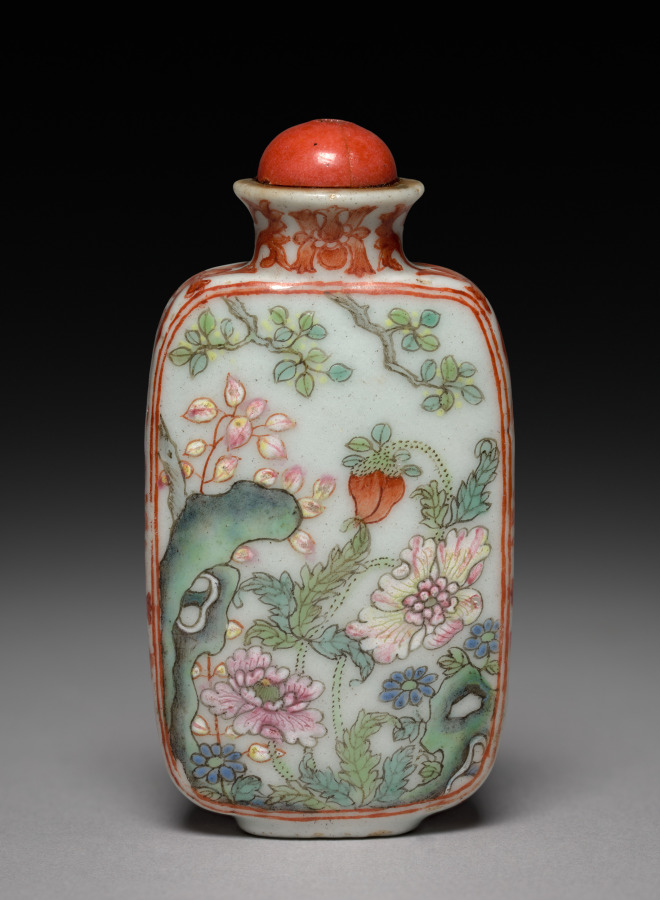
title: Snuff Bottle with Stopper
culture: China, Qing dynasty (1644–1911), Qianlong reign (1736–95)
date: 1736–95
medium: porcelain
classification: Ceramic